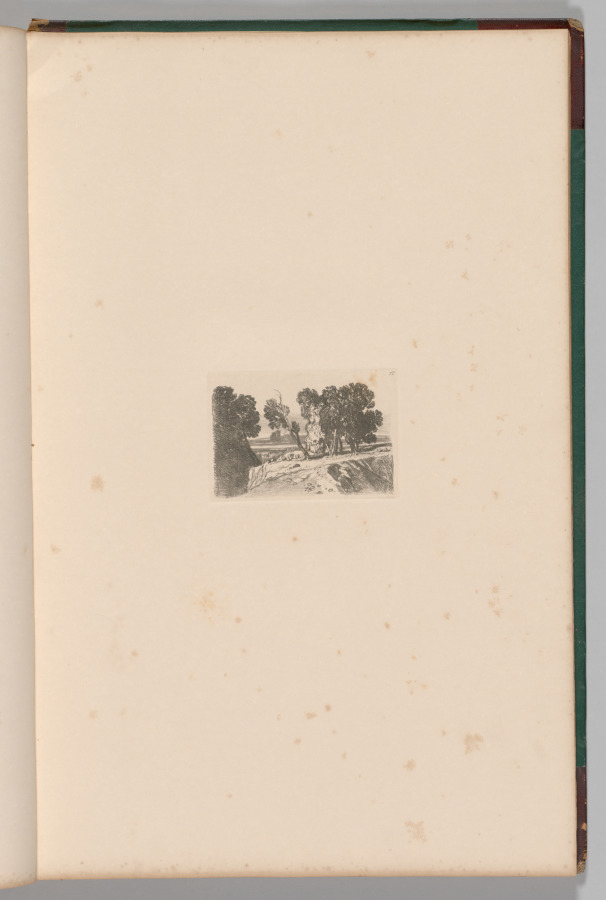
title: Liber Studiorum: Plate 17, A Study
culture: England, 19th century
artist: John Sell Cotman (British, 1782–1842)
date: 1838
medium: softground etching, from a bound volume containing 48 plates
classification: Bound Volume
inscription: In plate, within image, upper right: 17